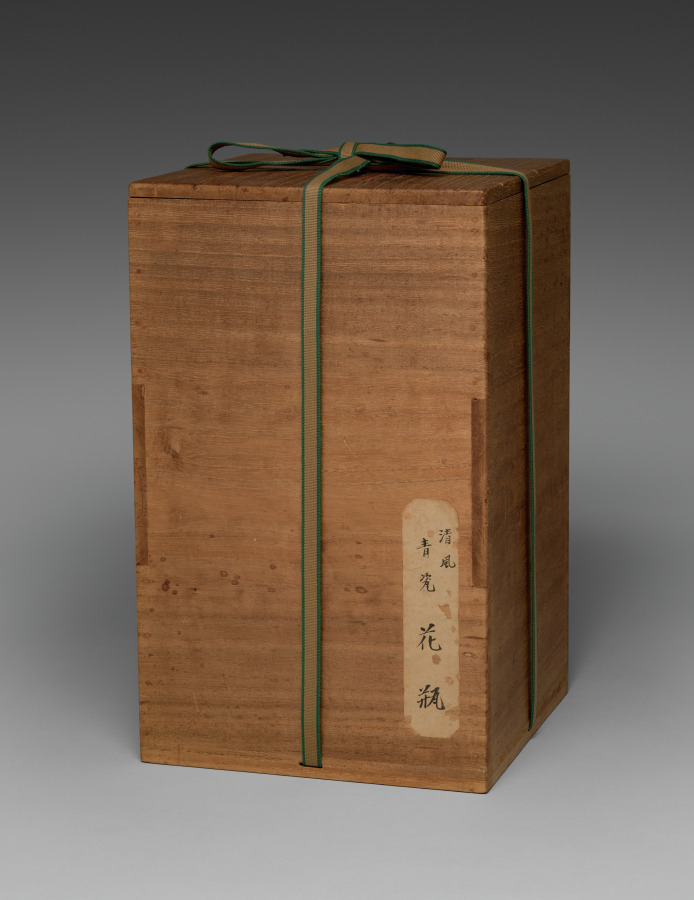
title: Hu-Shaped Vase with Handles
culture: Japan, Taishō period (1912–26) or Shōwa period (1926–89)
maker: Seifū Yohei IV (Japanese, 1872–1951)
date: 1914–46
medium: Porcelain with molded and carved design and green glaze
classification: Ceramic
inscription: 清風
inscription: 成山清風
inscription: 清風造【印】清風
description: Many of the vases created by Yohei III and IV were made with reference to and in emulation of Chinese ceramics in both form and glazing. The Seifu studio was inspired by later Chinese copies of two other archaic vessel types, the hu (Japanese ko) and guan (Japanese kan). In simple terms, in their original contexts, the hu and guan were storage jars that also appeared in ritual contexts. This hu-form vase by Yohei IV has a green glaze and handles in the shape of an elephant head. The details of the elephant heads are quite easy to miss, but a close look reveals that each has carved eyes with pupils defined, tiny ears and tusks in very low relief, and a curved trunk with the end curled up. This sort of container is even known as the “elephant ear” type. The only other decorative element on the vase’s pear-shaped body is a raised cordlike band around the shoulders.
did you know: The handles are shaped like elephant heads.